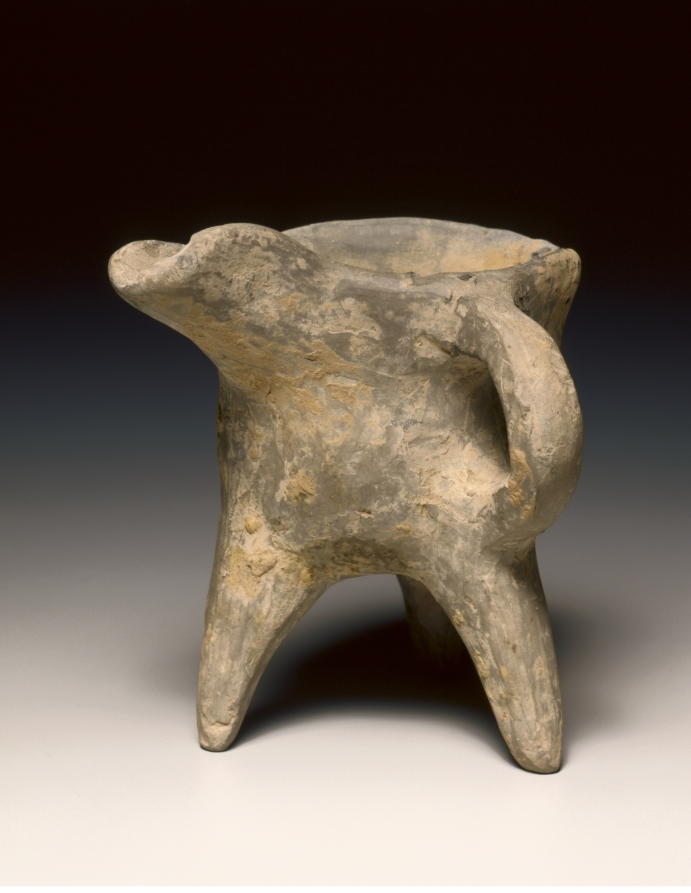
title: Wine Warmer (Jue)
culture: China, Shang dynasty (c. 1600–c. 1046 BCE), Anyang phase (c. 1250–1046 BCE)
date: c. 1300–1023 BCE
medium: pottery, tripod vessel with loop handle and rudimentary bowstring decoration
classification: Ceramic